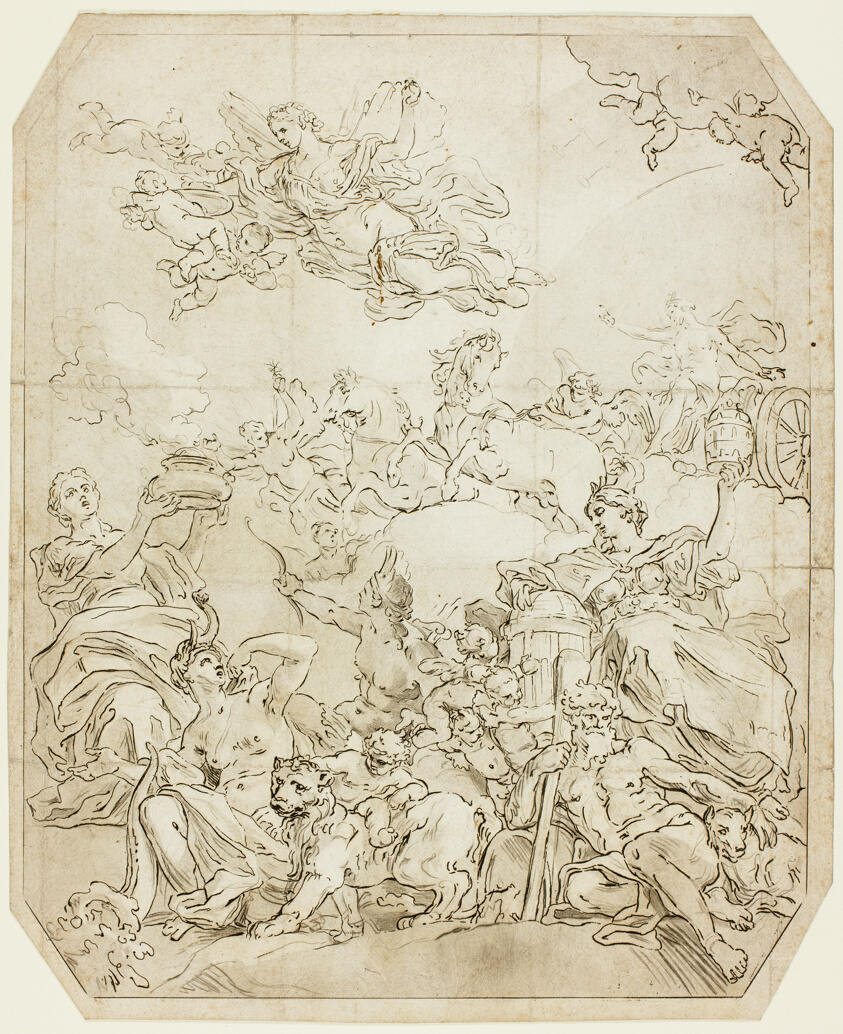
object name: Drawing and Watercolor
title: Aurora Heralds the Break of Day to the Four Corners of the Globe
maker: Unknown artist; Italian, 18th century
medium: Pen and black ink and brush and gray wash, over graphite, on ivory laid paper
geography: Italy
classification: pen and ink drawings; drawings (visual works); prints and drawing